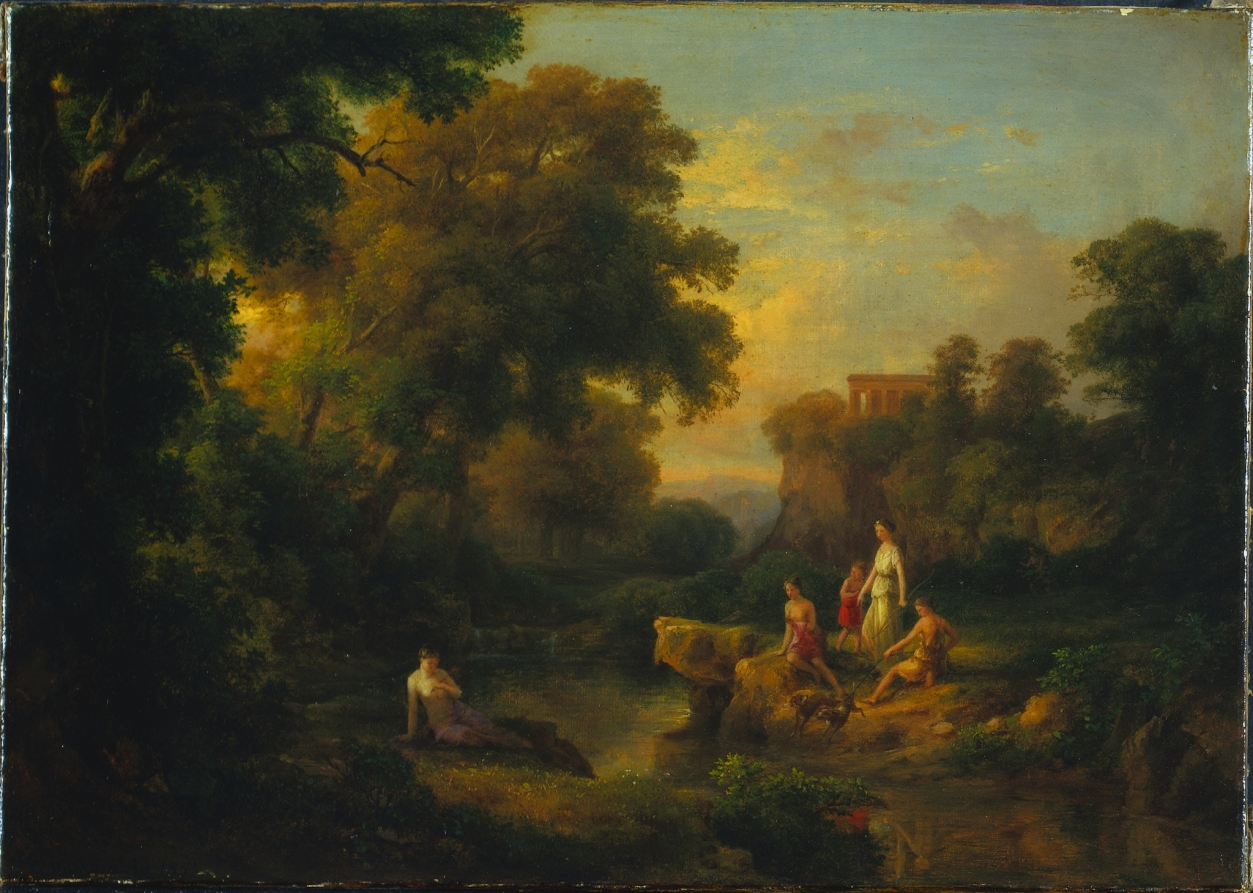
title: Diana and Her Nymphs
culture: Hungary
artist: Károly Markó (Hungarian, 1791–1860)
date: 1853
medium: oil on fabric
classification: Painting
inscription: Signed lower left: C. Markó p. Ap. 1853